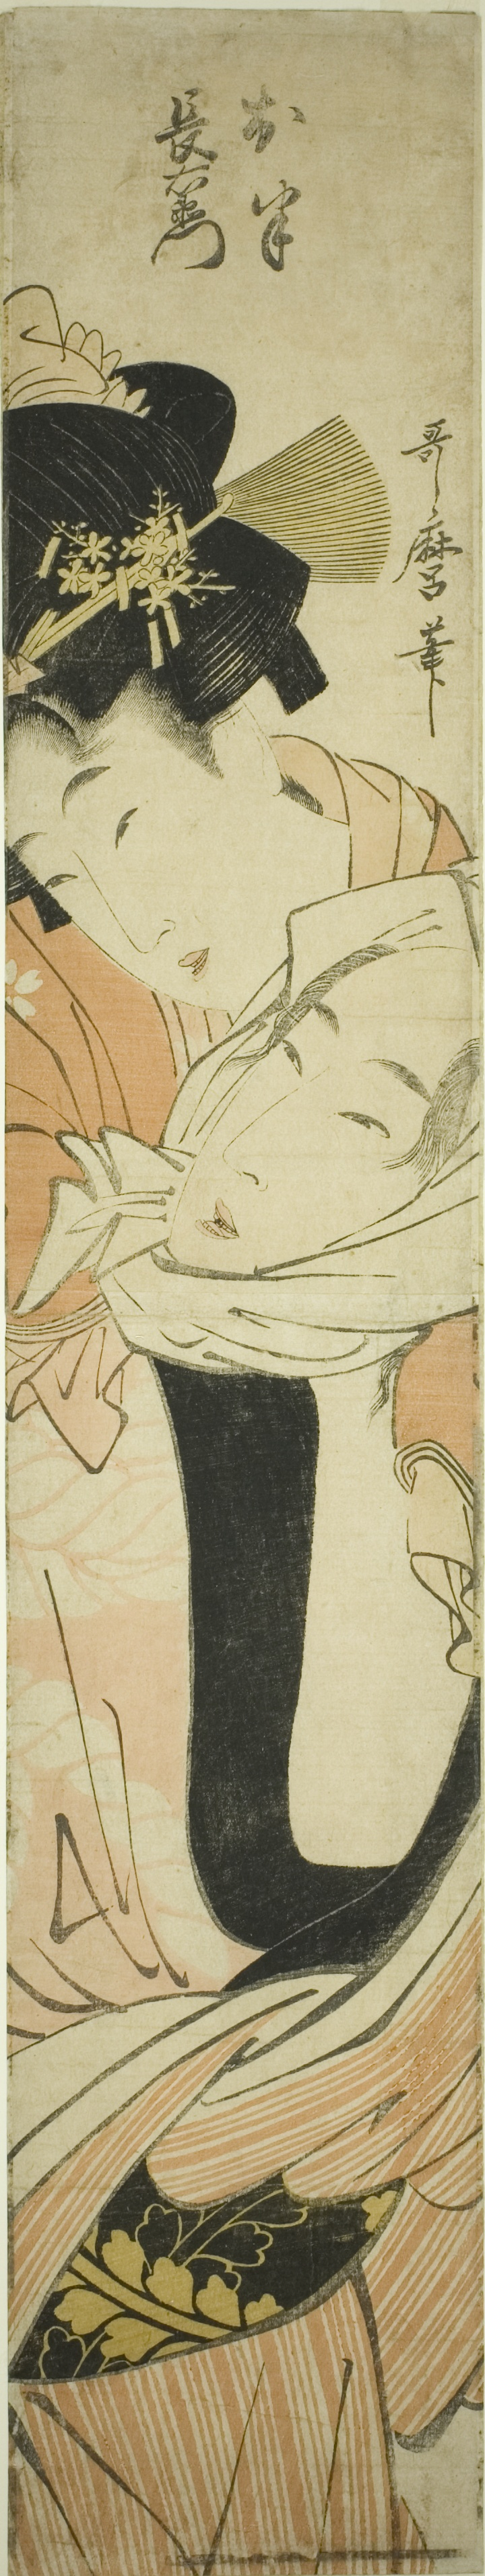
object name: Print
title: Choemon Carrying Ohan on His Back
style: Japanese (culture or style)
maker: Kitagawa Utamaro 喜多川 歌麿; Japanese, 1753 (?)-1806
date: c. 1801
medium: Color woodblock print; hashira-e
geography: Japan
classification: woodblock print; print; asian art